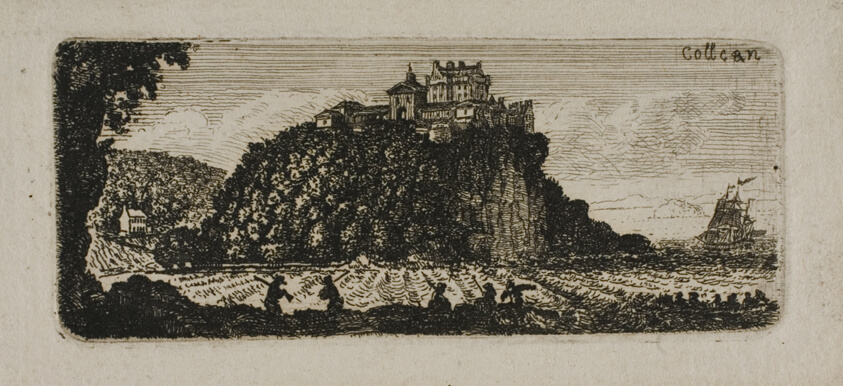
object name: Print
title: Colzean Castle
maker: John Clerk of Eldin (Scottish, 1728-1812)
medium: Etching on paper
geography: Scotland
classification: etching; print; prints and drawing